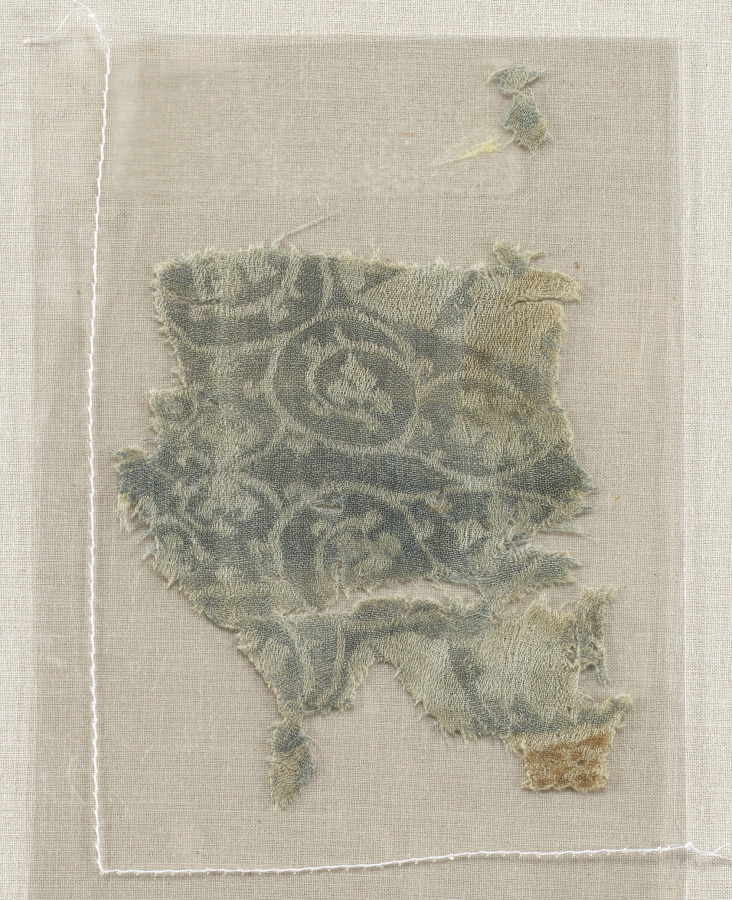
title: Fragment with Octagons and Four-Pointed Stars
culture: Iran or Iraq, in the style of the Seljuq period (1037–1194)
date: before 1949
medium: lampas weave, silk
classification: Textile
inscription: inni la-'a'lamu wal-layl janan anna al-jannah fi arja' difafihi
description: The design consists of aligned large-scale octagons and four-pointed star-shaped interspaces filled with leafy scrolls. Each octagon encloses pairs of regardant gazelles and non-regardant rabbits in mirror image against a foliate background, patterned in white on a light pinkish-tan ground. Framing the octagon is a Kufic inscription repeated in orthograde and retrograde around the central design.